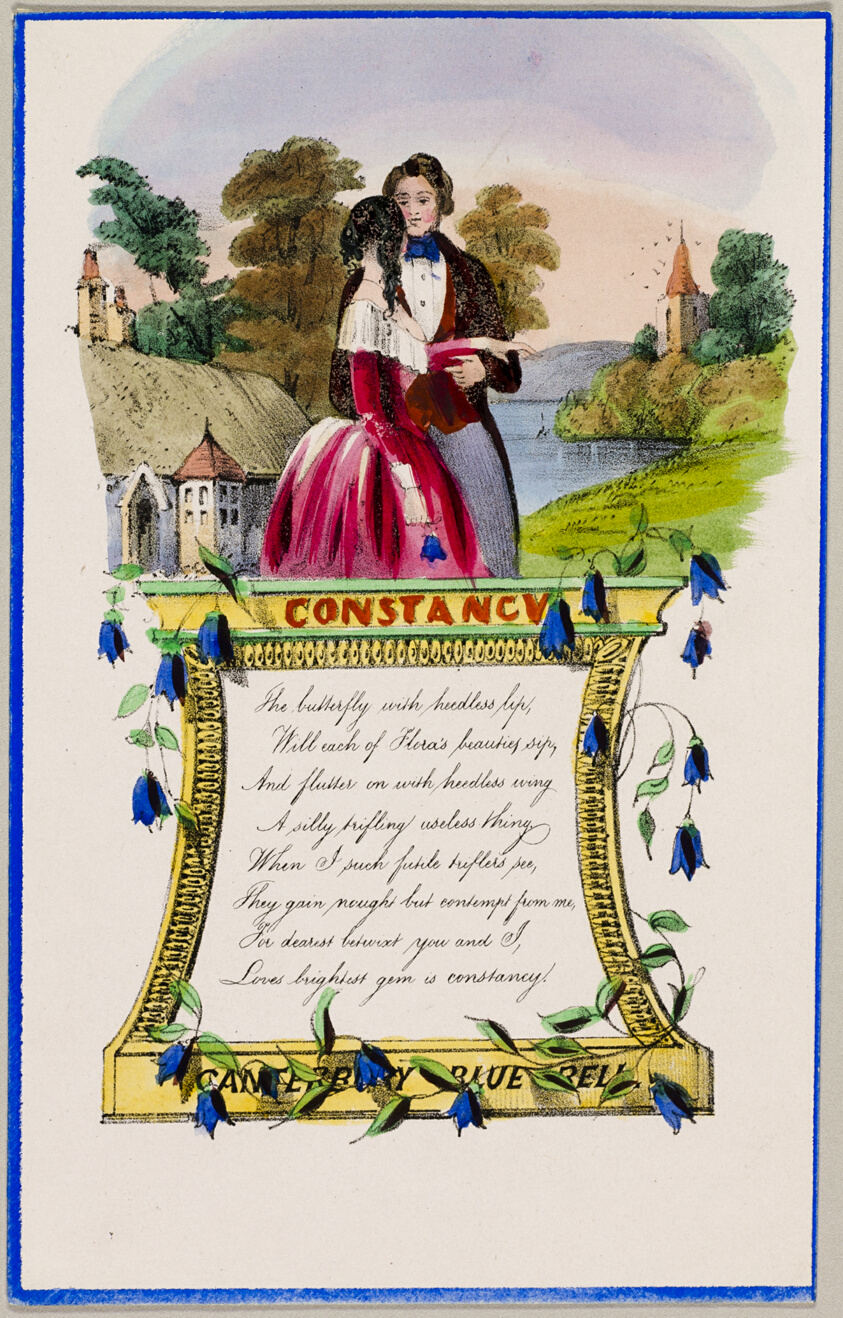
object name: Print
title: Constancy (valentine)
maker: Unknown Artist; English, 19th century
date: c. 1840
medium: Lithograph with hand-coloring on pinkish cream laid paper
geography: England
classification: valentine; prints and drawing; print